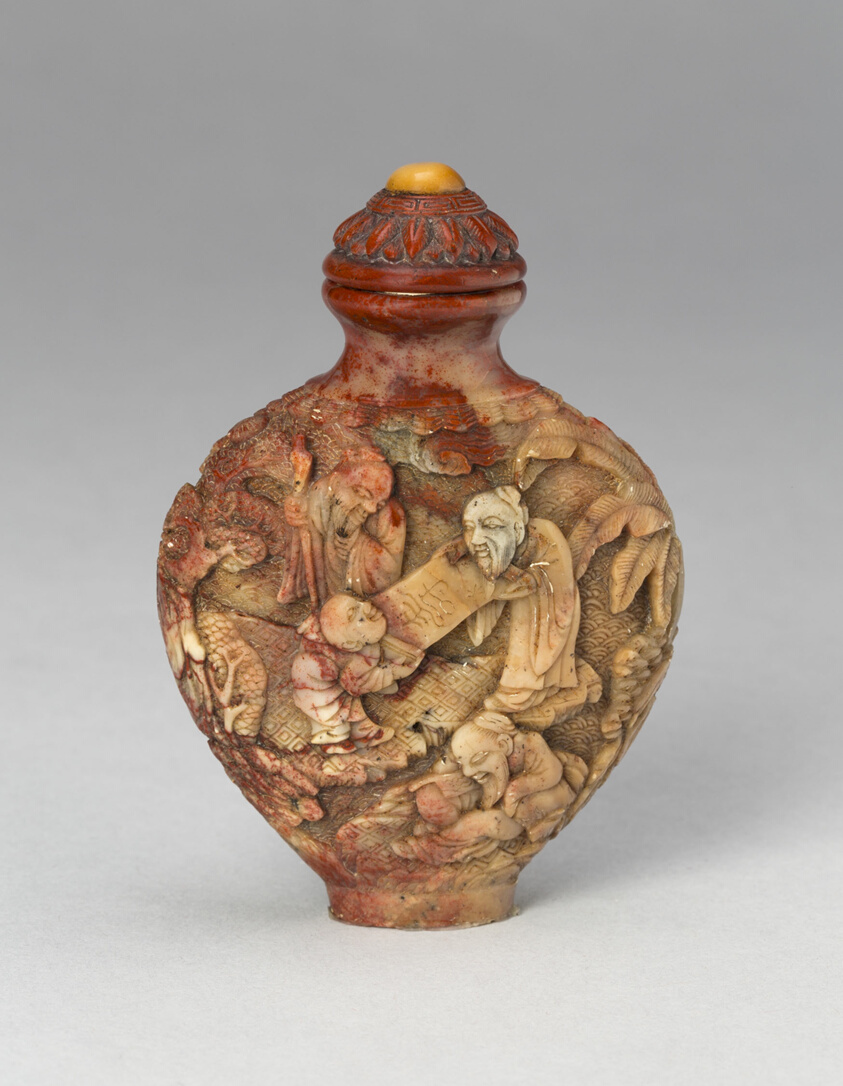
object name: Vessel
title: Snuff Bottle with Scholars and Assistants Opening a Scroll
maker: China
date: Qing dynasty (1644–1911), 1800–1900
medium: Soapstone with carved decoration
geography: China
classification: snuff bottle; stone; asian art; vessel